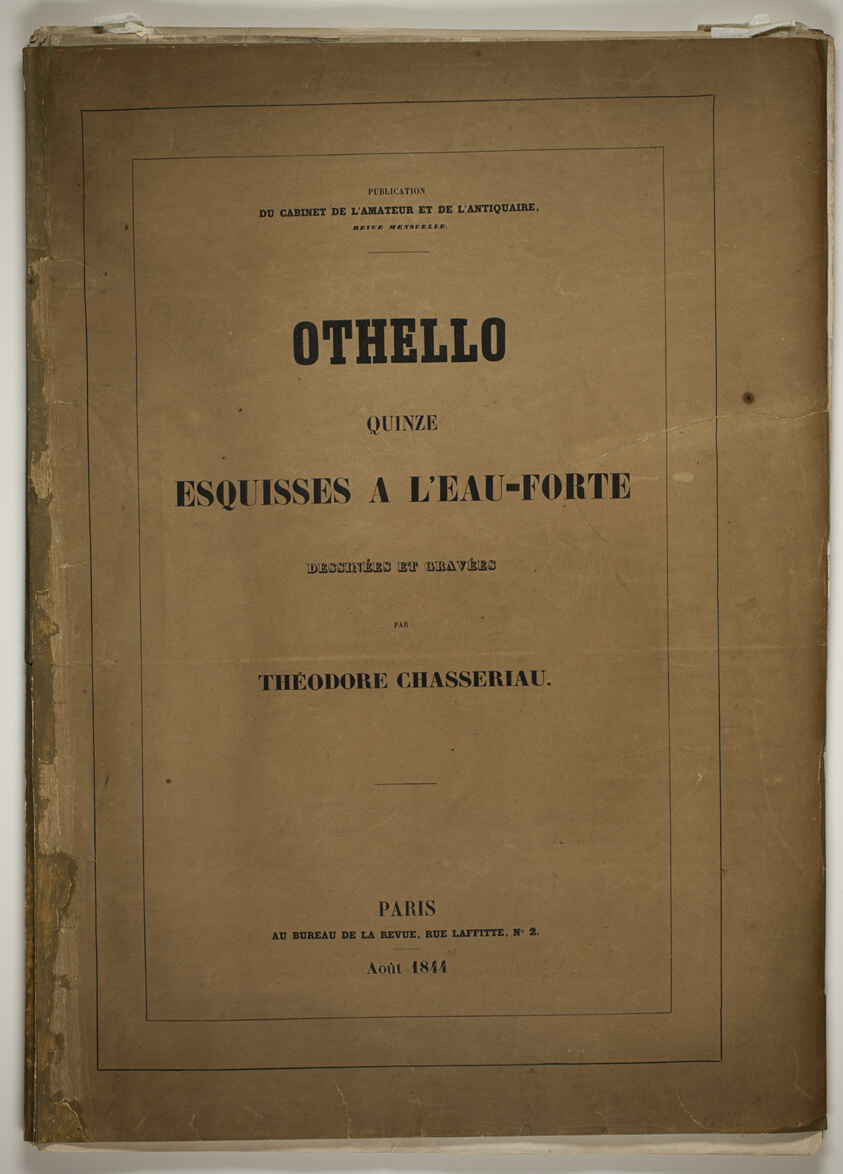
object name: Print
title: Frontispiece, from Othello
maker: Théodore Chassériau (French, 1819-1856)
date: 1844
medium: Etching, engraving, roulette, and drypoint on paper, folded in half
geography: France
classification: etching; print; prints and drawing